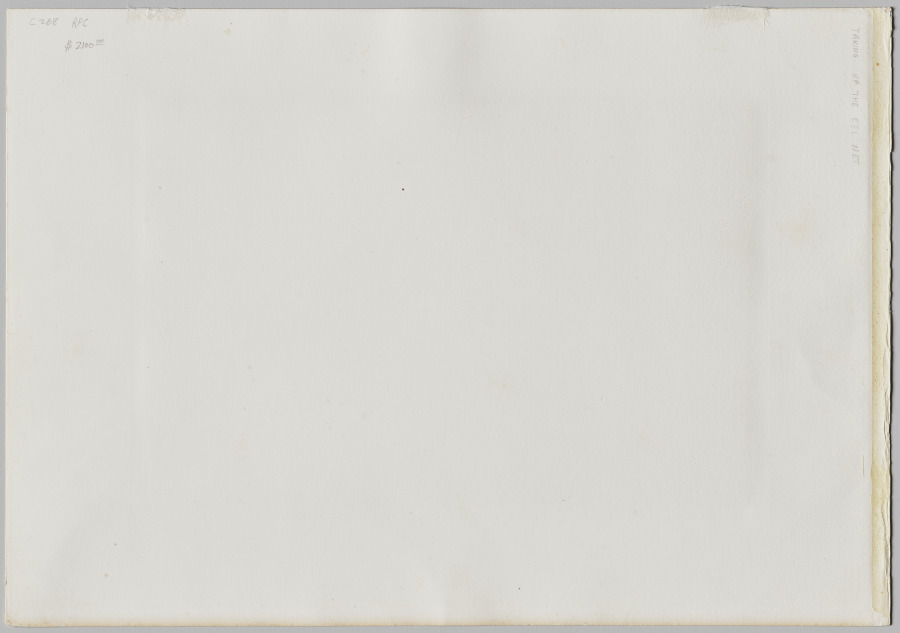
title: Taking Up the Eel Net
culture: England , 19th century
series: Life and Landscape on the Norfolk Broads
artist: Peter Henry Emerson (British, 1856–1936)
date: 1886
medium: platinum print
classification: Photograph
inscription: Written in pencil on verso of mount: “Taking Up the Eel Net”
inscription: Written in pencil on verso of mount: “C268 RPC/$2100.00”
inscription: Imprinted in sheet retained with photograph/mount: “Plate VII./Taking Up the Eel-Net”